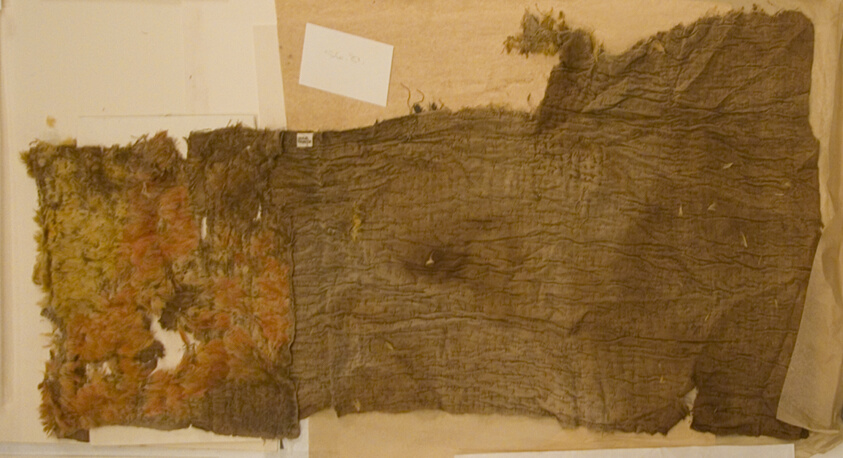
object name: Textile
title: Fragment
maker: Peru, south coast, Ingenio Valley, Hacienda Estudente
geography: Peru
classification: textile; weaving